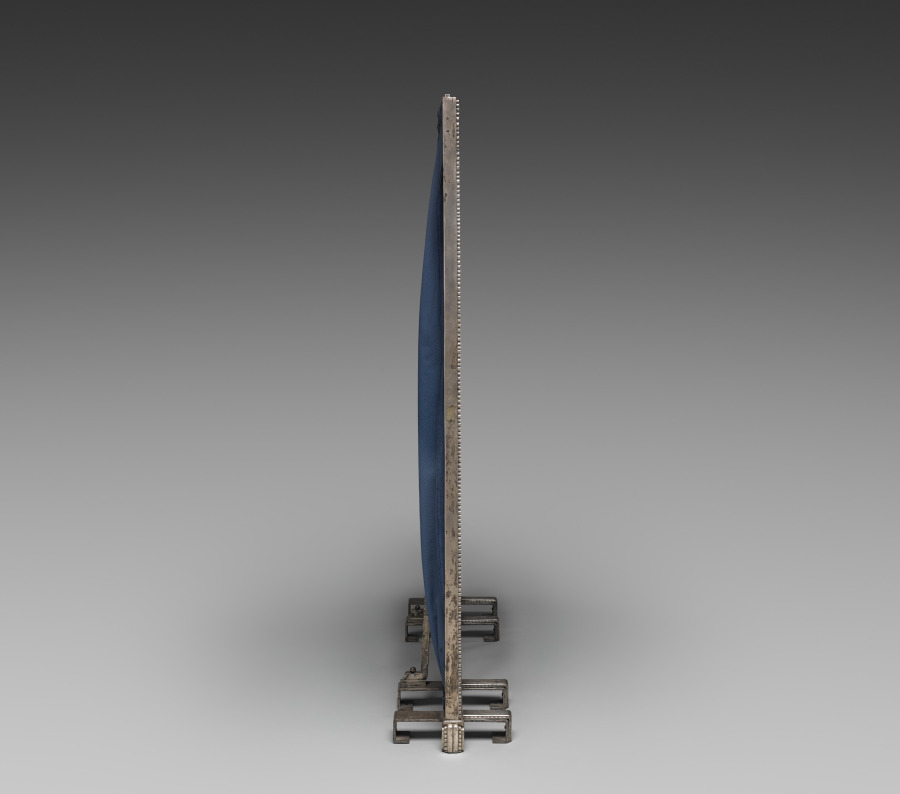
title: Muse with Violin Screen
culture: America, Ohio, Cleveland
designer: Paul Fehér (American, born Hungary, 1898–1990)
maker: Rose Iron Works (America, Ohio, Cleveland, est. 1904)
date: 1930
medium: Steel, brass; silver and gold plating, cotton velveteen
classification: Metalwork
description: Since the early years of the 20th century, the Rose Iron Works, a Cleveland supplier of architectural ornament, has produced distinguished metalwork. The company’s founder, Martin Rose, was born in Austria-Hungary and studied ornamental metalsmithing in Vienna prior to immigrating to Cleveland in 1902. In the 1920s, he hired a talented young Parisian designer, Paul Fehér, to work for the firm. Fehér’s designs, culminating in this massive screen, brought a modern European sensibility to the Rose Iron Works production. With its geometric patterning, highly stylized and abstracted natural forms, and the central figure reminiscent of the celebrated jazz singer Josephine Baker, this screen reflects the classic motifs of Art Deco design.